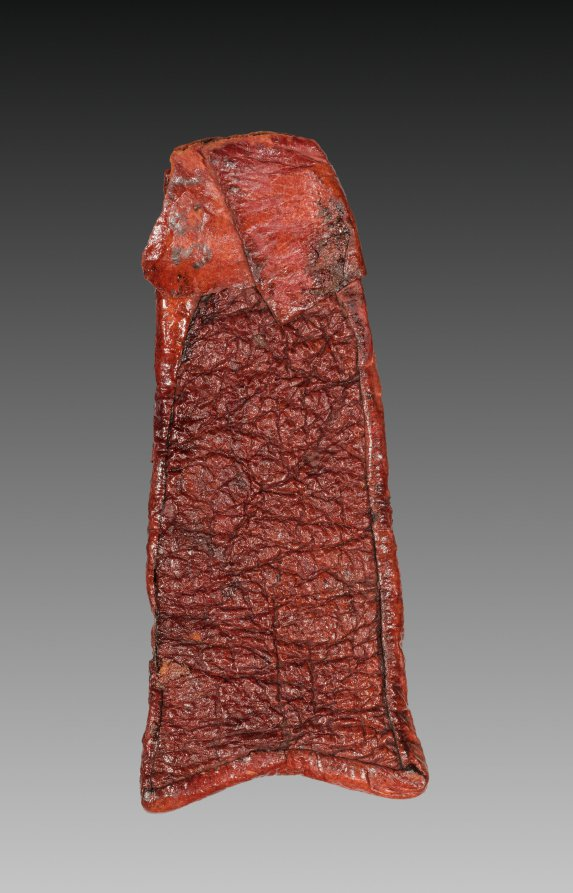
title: Tab from Mummy Band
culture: Egypt, Third Intermediate (1069–715 BCE), Dynasty 22, reign of Osorkon I (992–887 BCE)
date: 945–715 BCE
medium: stained leather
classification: Funerary Equipment